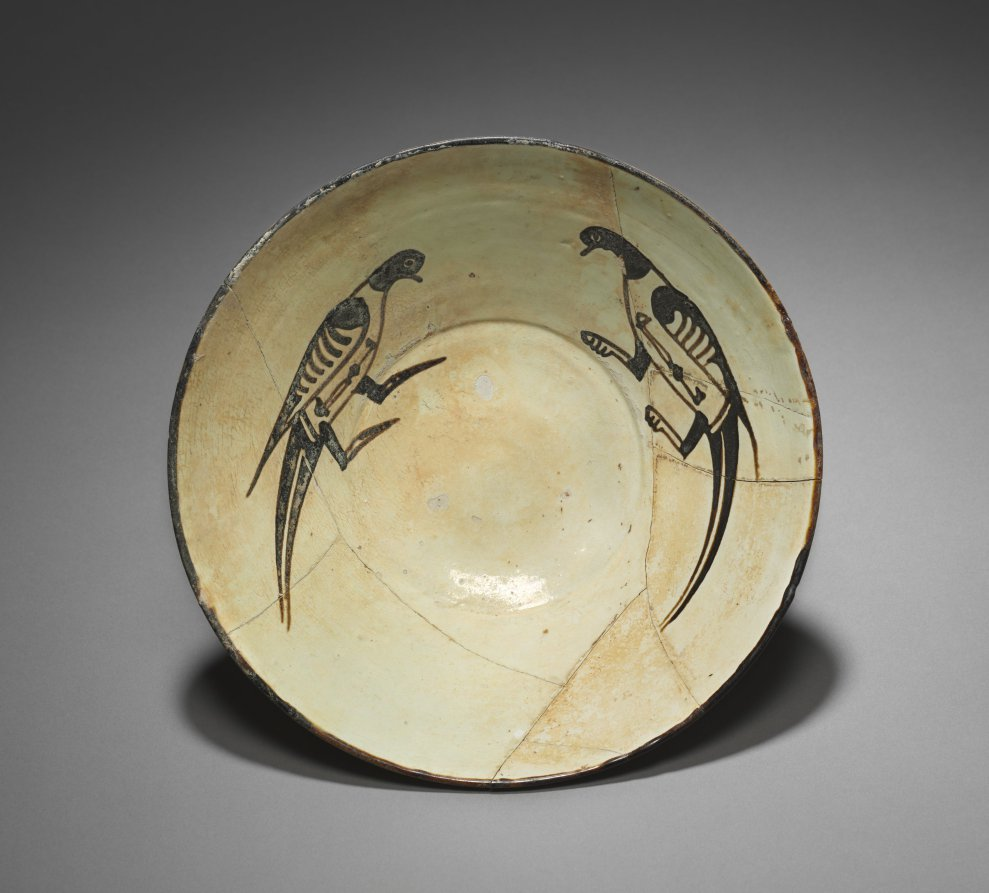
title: Bowl with Two Birds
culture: Iran, Nishapur or Central Asia, Samarkand, Samanid Period, 10th century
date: 900s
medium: earthenware with underglaze slip-painted decoration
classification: Ceramic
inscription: On body of each bird is a highly stylized inscription, probably the Arabic work baraka ("blessing").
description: Two facing birds painted with dark brown slip (clay diluted with water) on a plain white slip ground were a popular decoration in eastern Iran. A stylized Arabic word, baraka (blessing), appears on each bird’s body.